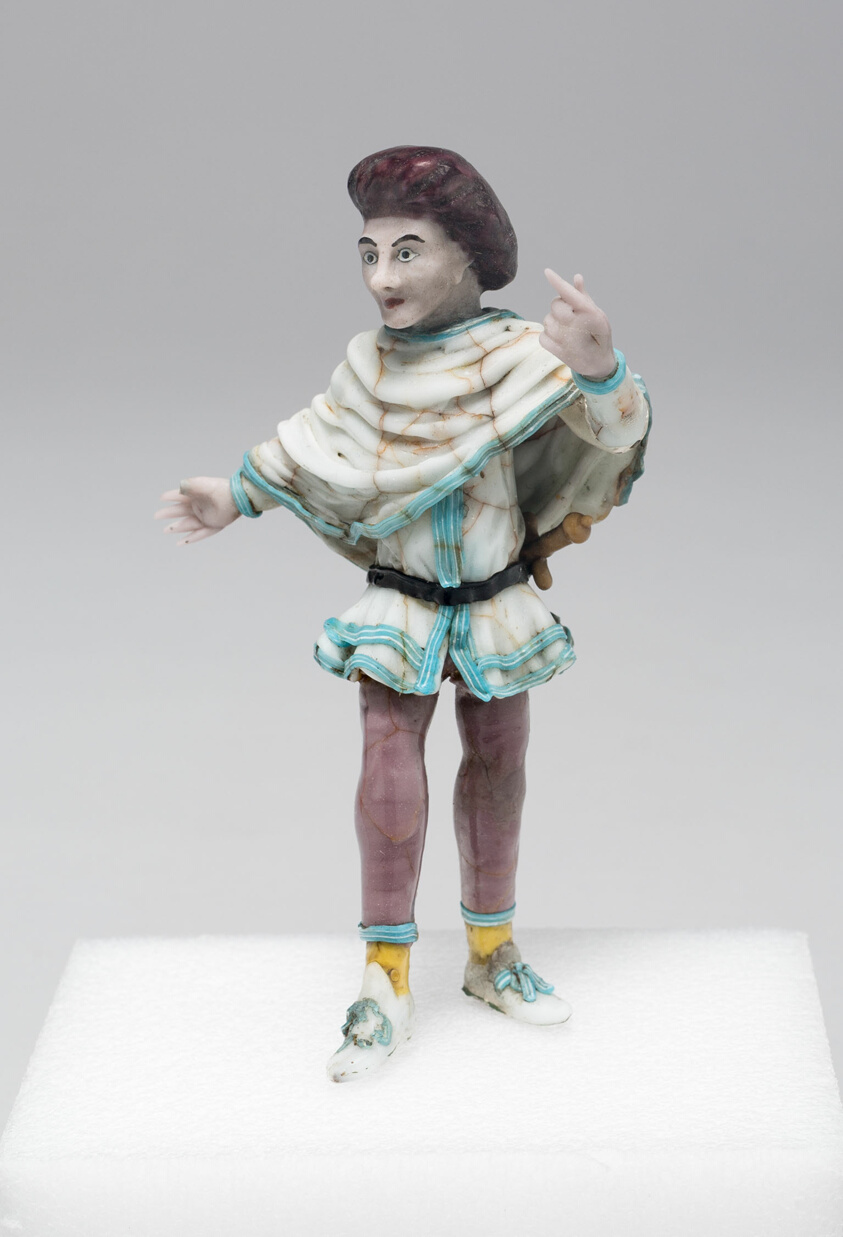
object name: Glass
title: Actor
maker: Nevers, France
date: Late 17th to early 18th century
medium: Glass; lampwork (verre de Nevers), metal armature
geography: France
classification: decorative object/ornament; lampwork; glass; european decorative arts